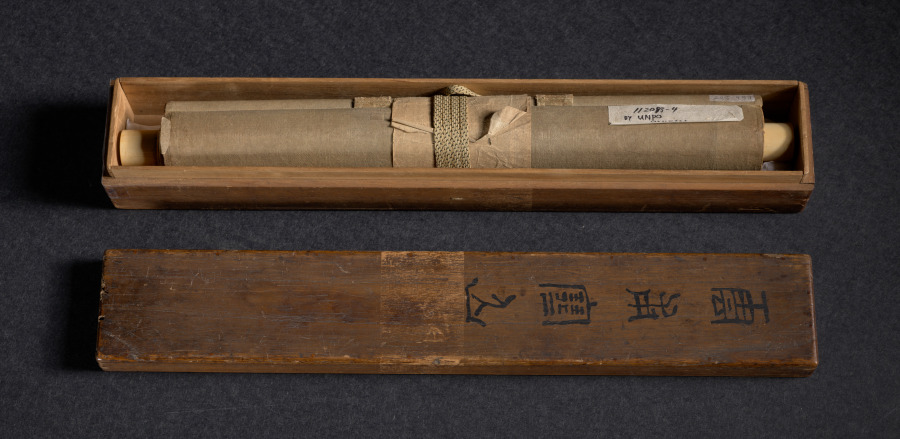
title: Kanzan Holding a Scroll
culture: Japan, Muromachi period (1392–1573)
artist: Unpo Shūkū (Japanese, active 1400s)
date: 1400s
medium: hanging scroll; ink on paper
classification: Painting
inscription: signed: "Unpo"